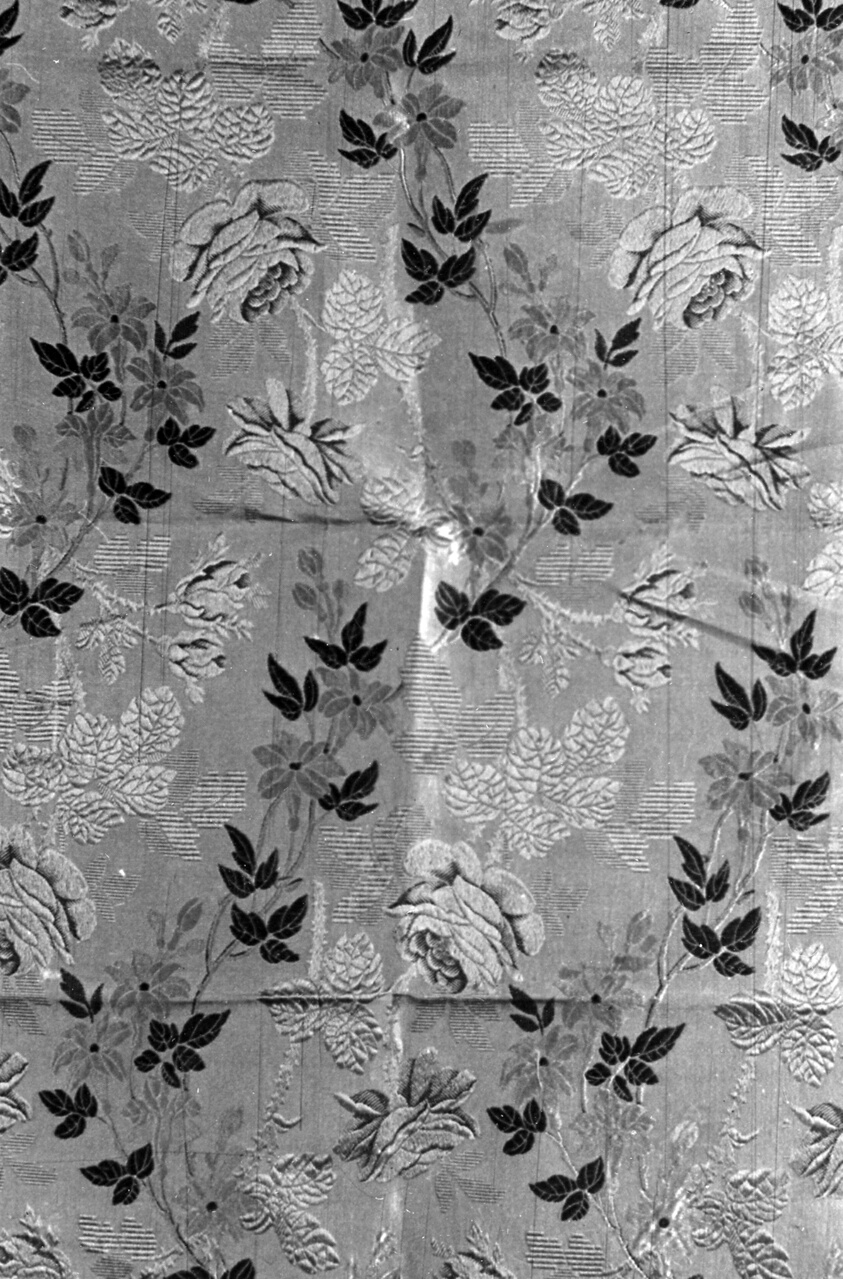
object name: Textile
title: Fragment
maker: England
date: 1840/50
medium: Silk, plain weave with supplementary patterning warps and self-patterned by two-color complementary ground weft floats; woven on loom with Jacquard attachment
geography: England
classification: textile; weaving